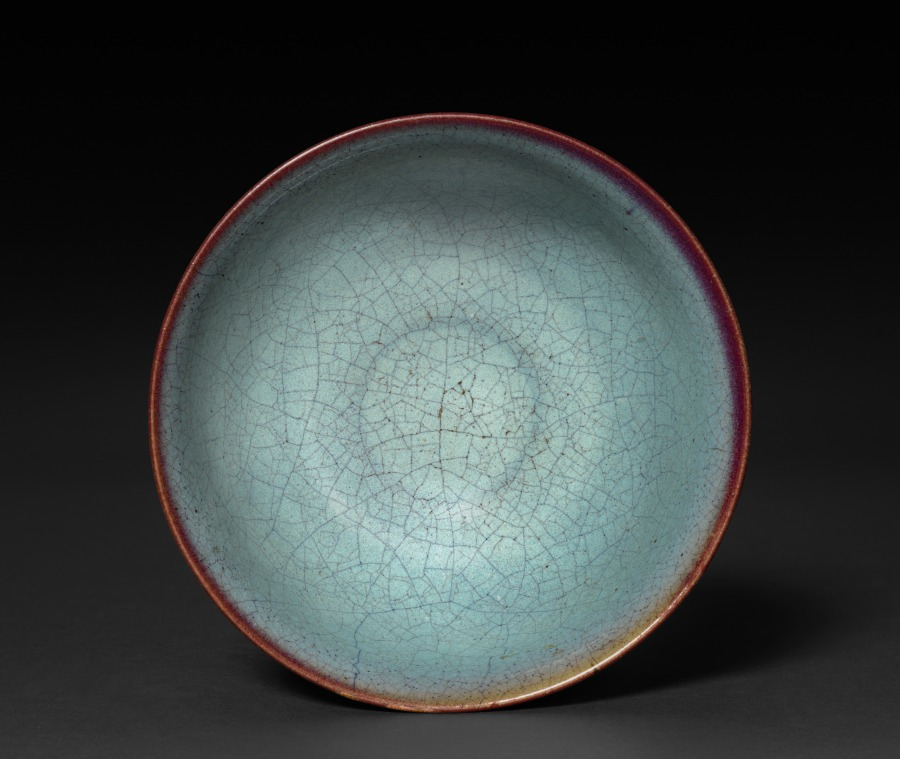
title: Bowl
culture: South China, Yuan dynasty (1271–1368) to Ming dynasty (1368–1644)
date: 1300s–1400s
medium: glazed gray stoneware, Jun ware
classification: Ceramic